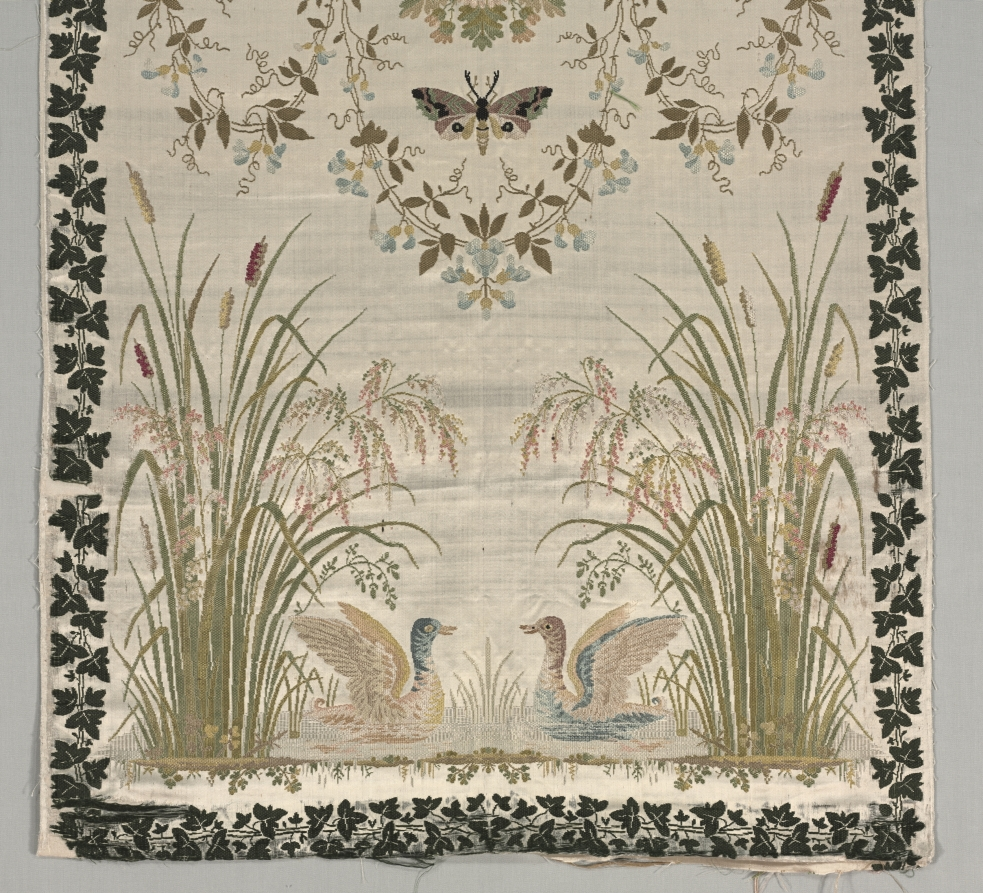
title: Wall Covering with Classical Figure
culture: France, late 18th-early 19th Century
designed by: Philippe de Lasalle (French, 1723–1805)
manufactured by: Camille Pernon & Cie (French)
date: late 1700s - early 1800s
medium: Silk: llampas (satin weave and plain weave variant), brocaded, appliquéd, embroidered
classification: Textile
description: France developed a thriving silk industry in Lyon with the goal of becoming the fashion center of Europe. Employment soared to some 20,000 workers by the time of the French Revolution in 1789. Designs changed annually, colors established new fashions, and spectacular silks were produced during the late 1700s. Philippe de Lasalle, trained as a painter by François Boucher, became the celebrated chief textile designer for Camille Pernon & Cie, purveyors to King Louis XVI (reigned 1785-90). Lasalle’s floral style with large and balanced designs, enhanced here with a fashionable classical figure, displays his preference for lighter forms without the opulent gold thread of earlier brocaded silks.